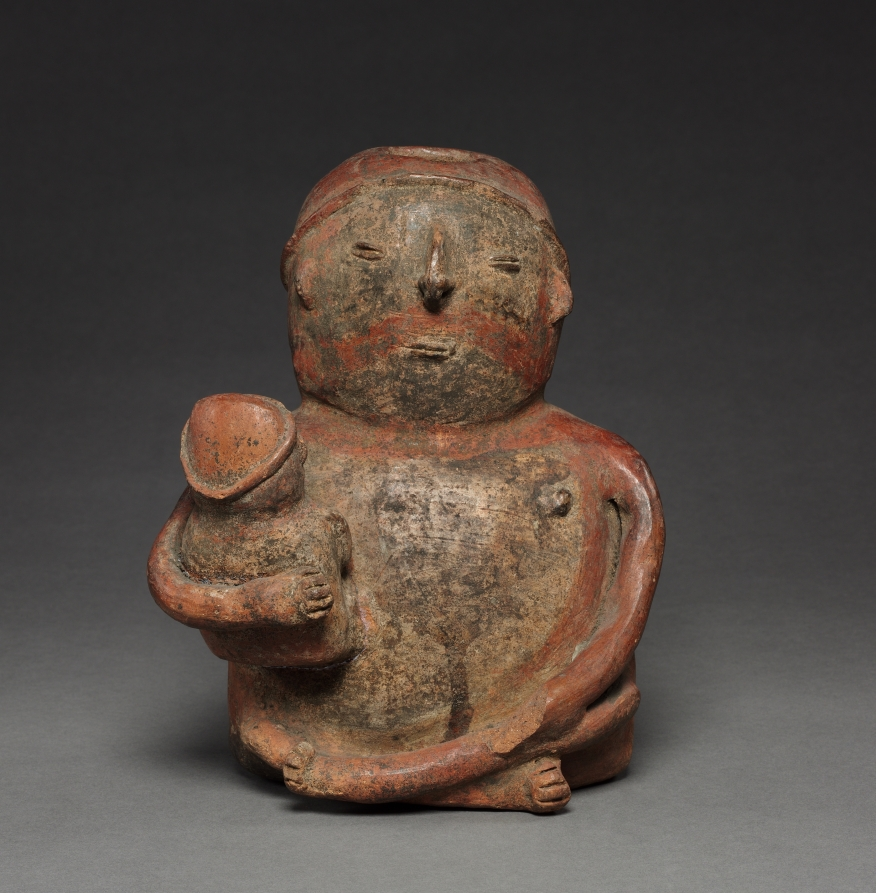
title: Figures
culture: Colombia, 18th-19th century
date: before 1921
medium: red ware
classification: Ceramic